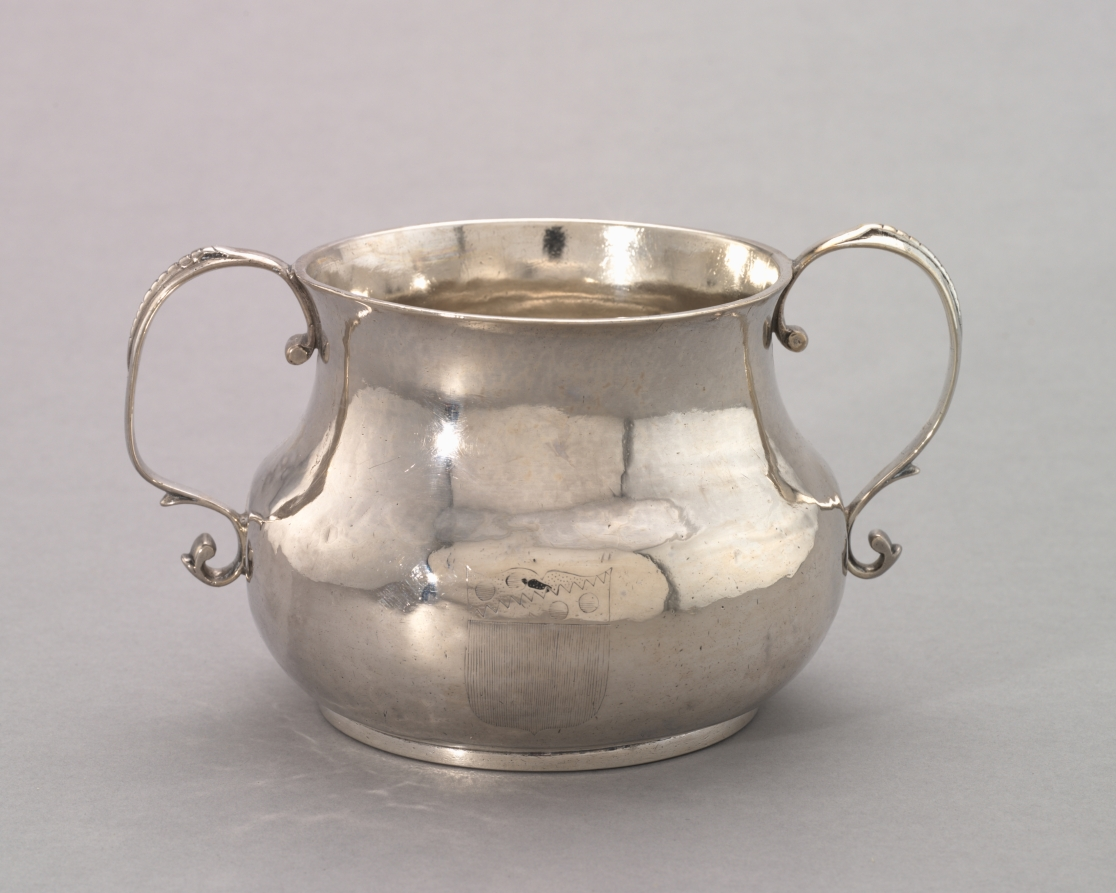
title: Two-Handled Cup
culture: America, Massachusetts, Boston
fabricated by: George Hanners (American, c. 1696–1740)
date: c. 1720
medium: silver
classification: Silver